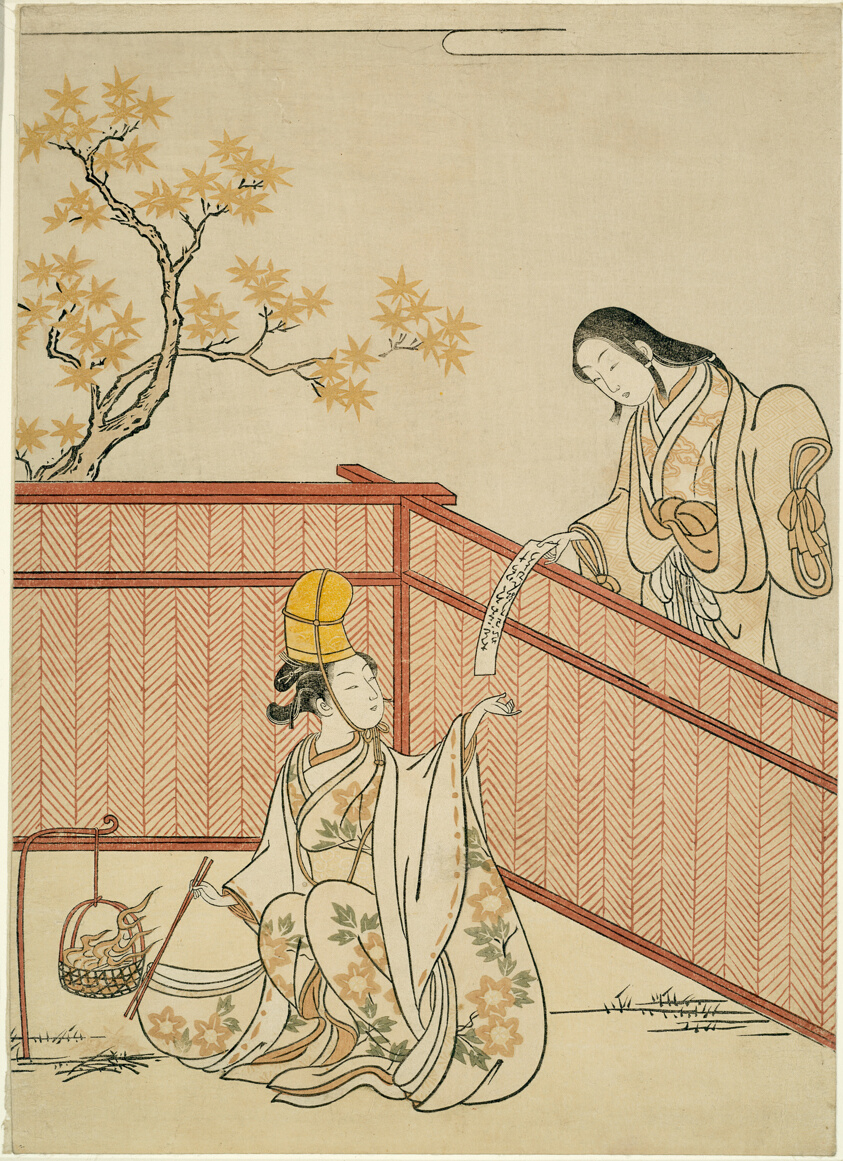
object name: Print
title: Burning Autumn Maple Leaves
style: Japanese (culture or style)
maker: Suzuki Harunobu 鈴木 春信; Japanese, 1725 (?)-1770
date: 1765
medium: Color woodblock print; chuban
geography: Japan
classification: woodblock print; print; asian art